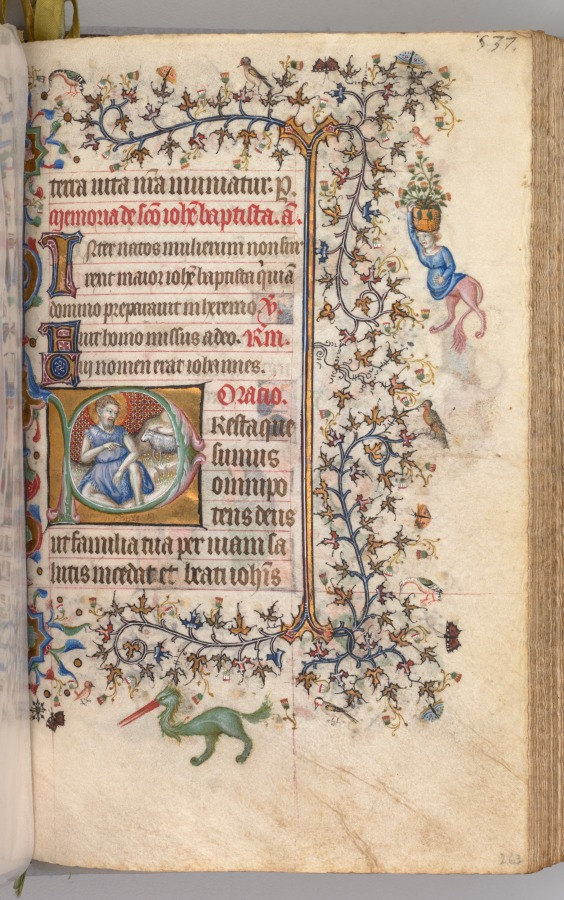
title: Hours of Charles the Noble, King of Navarre (1361-1425): fol. 260v, St. John the Baptist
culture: France, Paris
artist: Master of the Brussels Initials and Associates (French)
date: c. 1405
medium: ink, tempera, and gold on vellum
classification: Bound Volume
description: This precious volume was obviously highly prized by its owner, the French-born King of Navarre, who had his coat of arms painted on no less than twenty folios. Rather than directly commissioning this manuscript from a specific workshop, it seems that Charles the Noble acquired his book of hours -- perhaps ready-made for the luxury market -- while on a trip to Paris in 1404-05. A collaborative effort, six painting styles are evidenced within the pages of this codex, those of two Italians, two Frenchmen, and two Netherlanders. The painter who was responsible for the planning and decoration of the book, and who produced seventeen of the large miniatures, was a Bolognese artist known as the Master of the Brussels Initials. His principal assistant, responsible for most of the borders, was a Florentine who signed his name "Zecho" da Firenze on folio 208 verso.